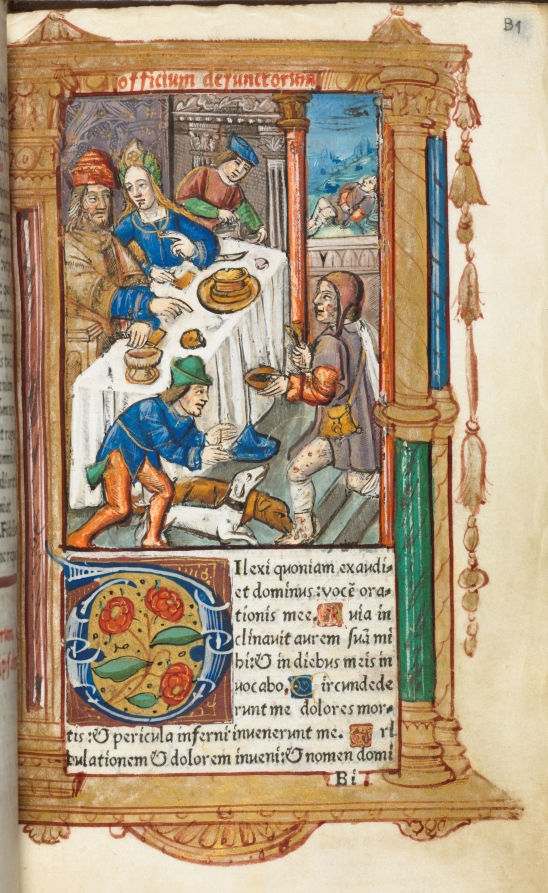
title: Printed Book of Hours (Use of Rome): fol. 73r, Lazarus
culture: France, Paris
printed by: Guillaume Le Rouge (French, Paris, active 1493–1517)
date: 1510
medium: 112 Printed folios on parchment, bound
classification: Bound Volume